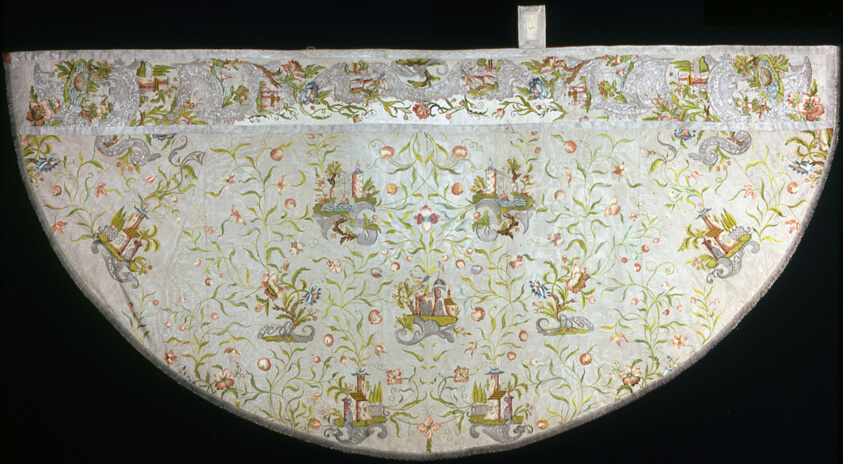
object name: Religious/Ritual Object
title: Cope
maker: France or England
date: 1775/1825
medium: Silk, warp-faced, weft-ribbed plain weave; embroidered with silk floss and yarns, gilt- and silvered-metal-strip-wrapped silk, and silvered-metal strips in satin, split, and stem stitches; couching, padded couching, laid work and French knots; edged with silk and gilt-metal-strip-wrapped silk, woven tapes and fringe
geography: France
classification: textile; needlework (visual works); ritual objects